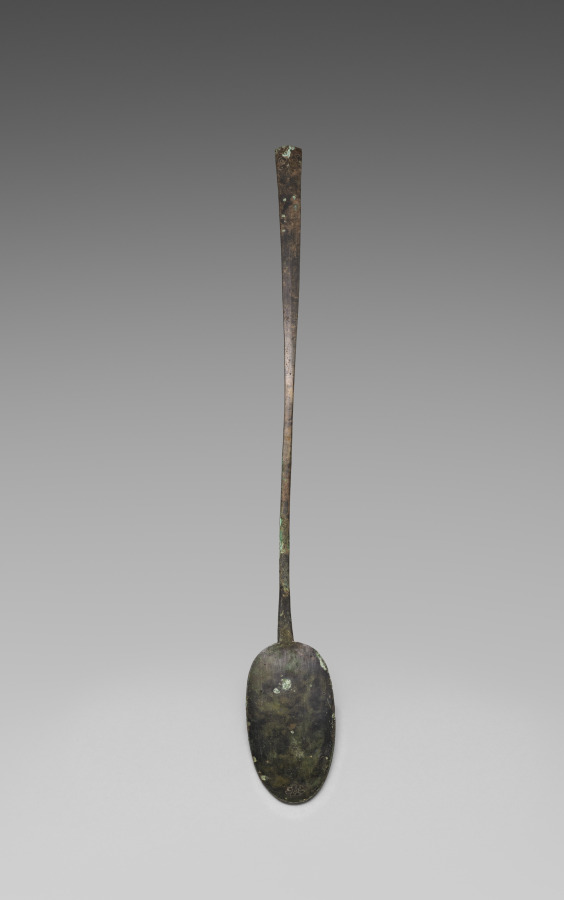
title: Spoon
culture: Korea, Goryeo dynasty (918–1392)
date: 918–1392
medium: silver bronze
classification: Metalwork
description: Celadons, spoons, seals, and bronze mirrors were the most common burial objects in tombs during the Goryeo period (918–1392). Furnishing tombs with an elaborate assemblage of objects was believed to honor and comfort the newly dead. Generally, Goryeo tombs were left untouched until the late 19th century. During the colonial period (1910–45), however, Japanese archaeologists hastily excavated the tombs located in Kaeseong, the former capital of the Goryeo period. Scholars recently have proposed that toward the end of the 14th century, Koreans enjoyed meat-based soups more than any other dishes, explaining why many more spoons than chopsticks were buried in tombs.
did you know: Bronze spoons are the most common burial item. Scholars have proposed that toward the end of the 14th century, Koreans enjoyed meat-based soups more than any other dishes, explaining why spoons became common household items as well as burial goods.